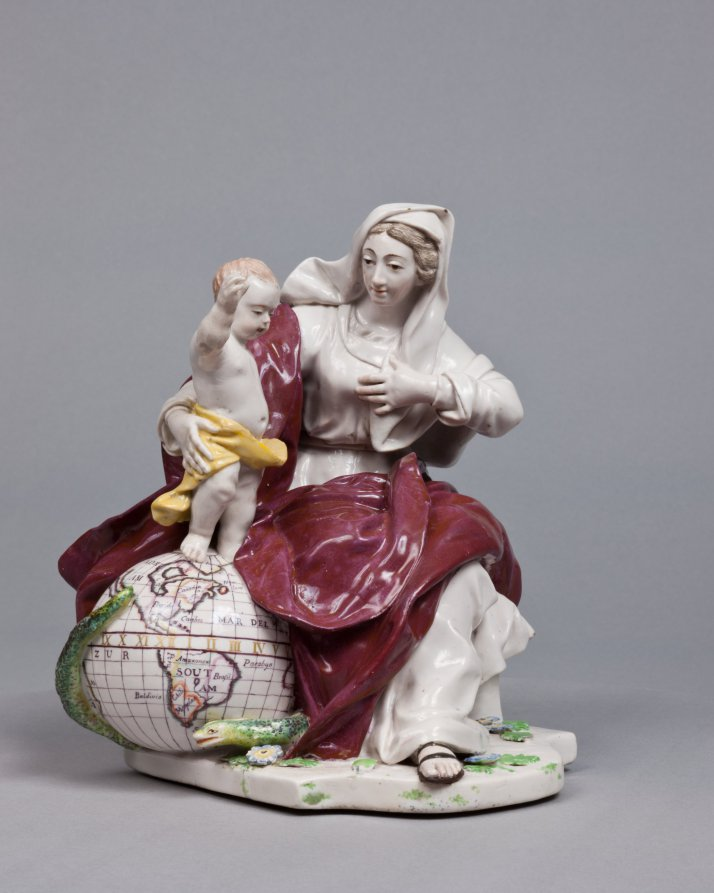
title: Madonna and Child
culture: England, Chelsea, 18th century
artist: Chelsea Porcelain Factory (Britain, London, 1745–84)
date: c. 1755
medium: porcelain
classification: Ceramic